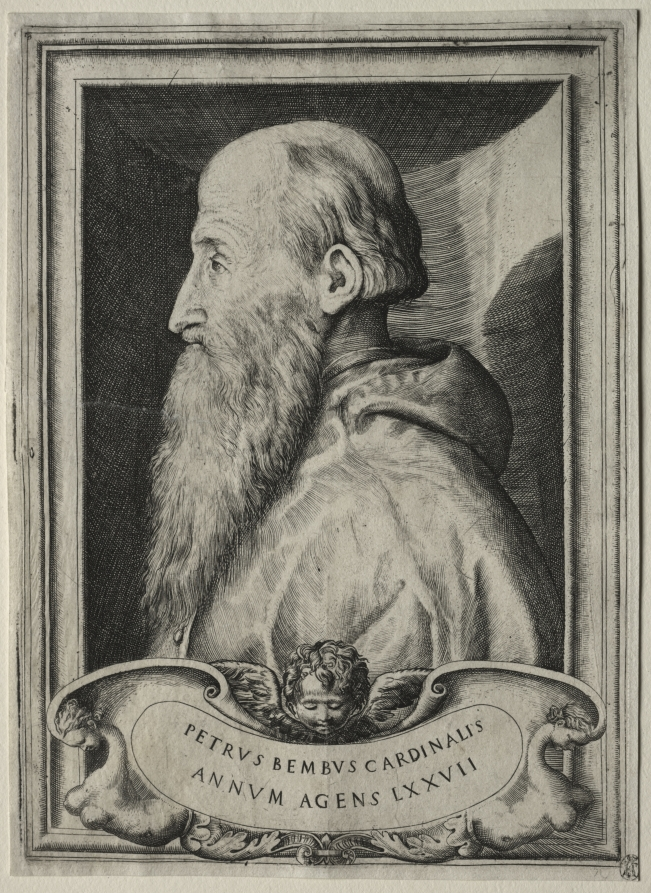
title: Portrait of Cardinal Pietro Bembo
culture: Italy, 16th century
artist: Giulio Bonasone (Italian, c. 1510–after 1576)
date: 1547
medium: etching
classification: Print